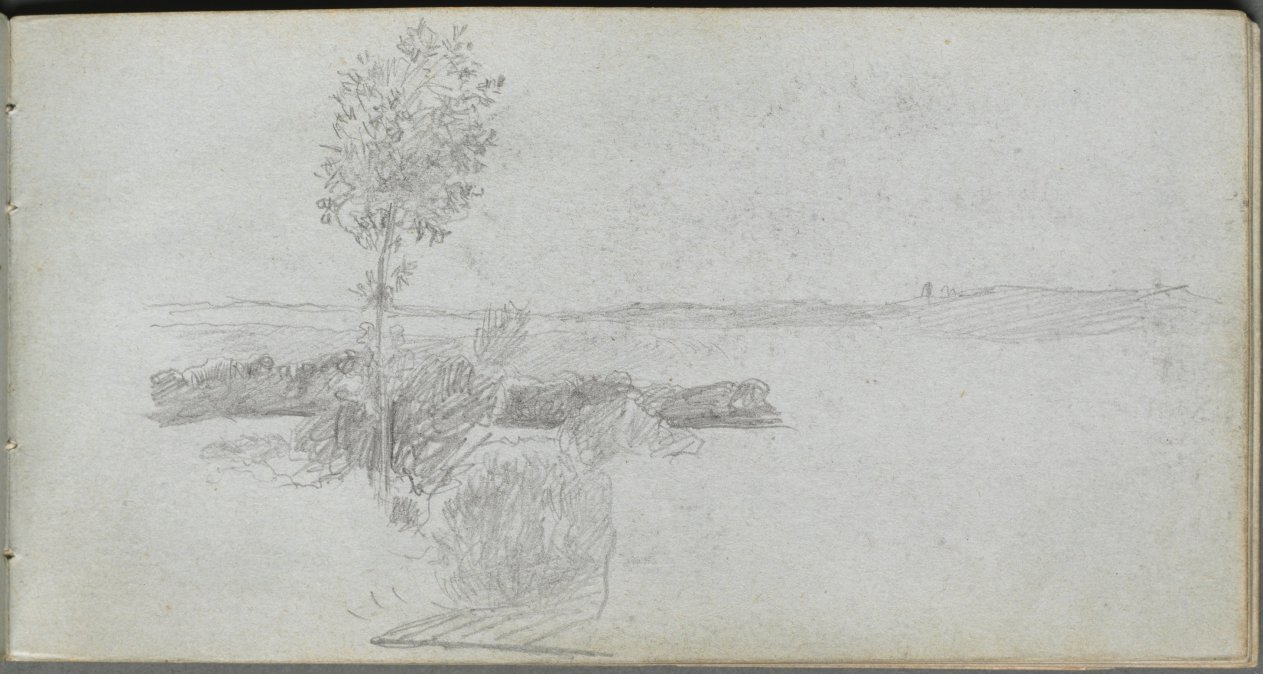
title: Sketchbook, page 28: Landscape Study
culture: France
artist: Ernest Meissonier (French, 1815–1891)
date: c. 1860s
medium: graphite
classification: Bound Volume